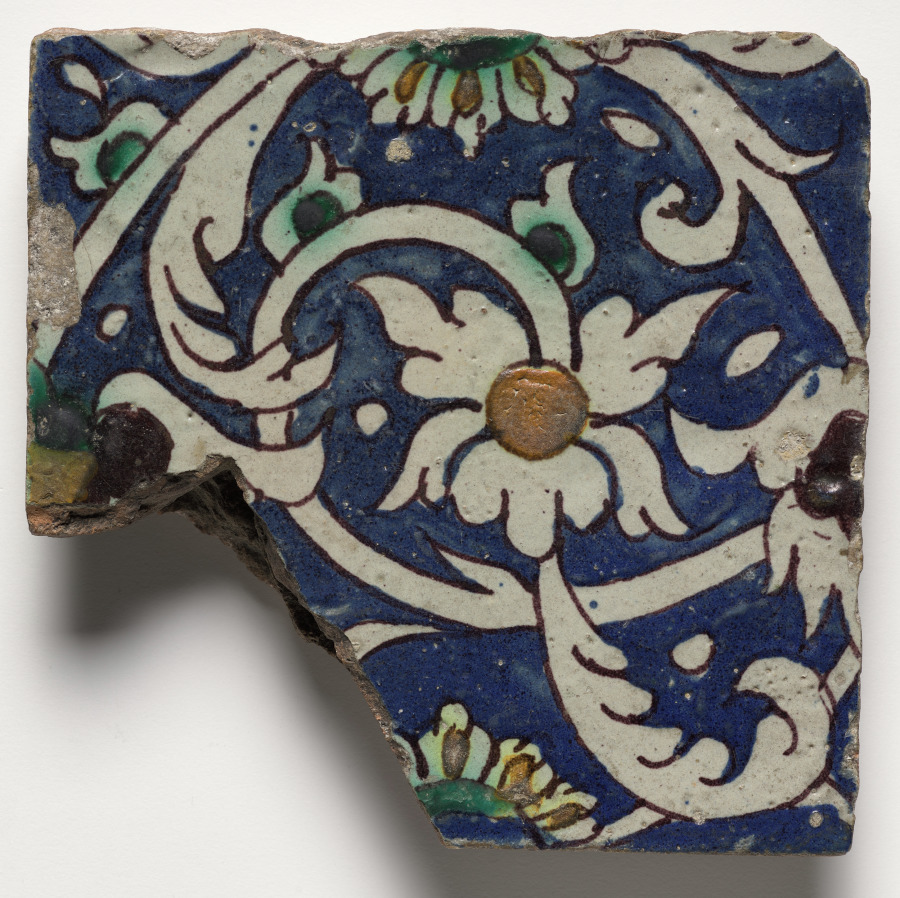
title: Tile–Foliated Scrolls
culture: Spain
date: c. 1700s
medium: glazed ceramic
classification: Ceramic